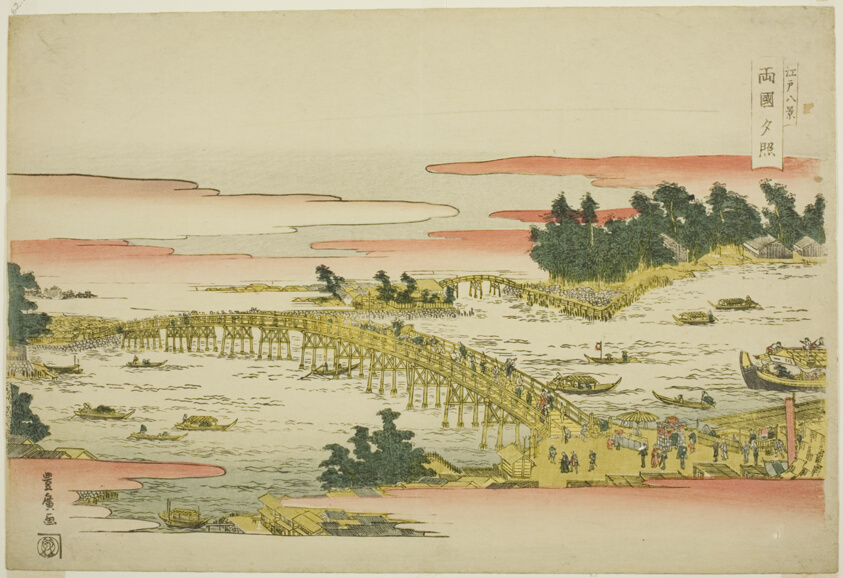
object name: Print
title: Evening Glow at Ryogoku Bridge (Ryogoku sekisho), from the series "Eight Views of Edo (Edo hakkei)"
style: Japanese (culture or style)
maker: Utagawa Toyohiro (Japanese, 1773-1828)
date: c. 1804/18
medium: Color woodblock print; oban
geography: Japan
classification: woodblock print; print; asian art